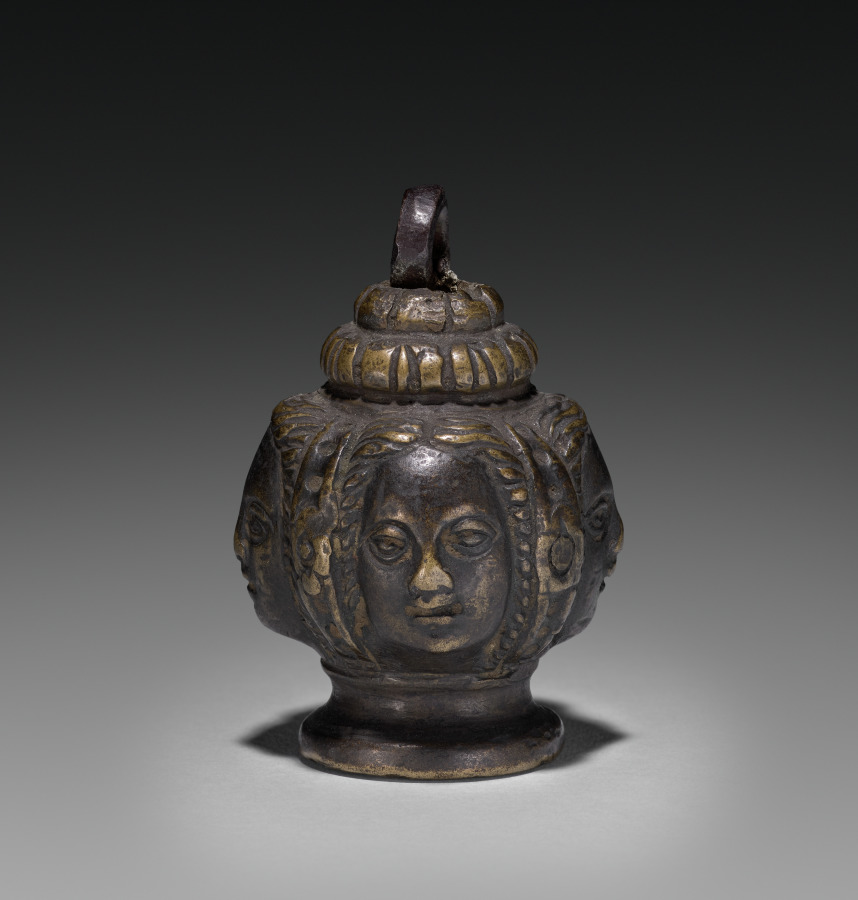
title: Decorative Finial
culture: Italian or French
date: 1800s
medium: brass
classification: Arms and Armor